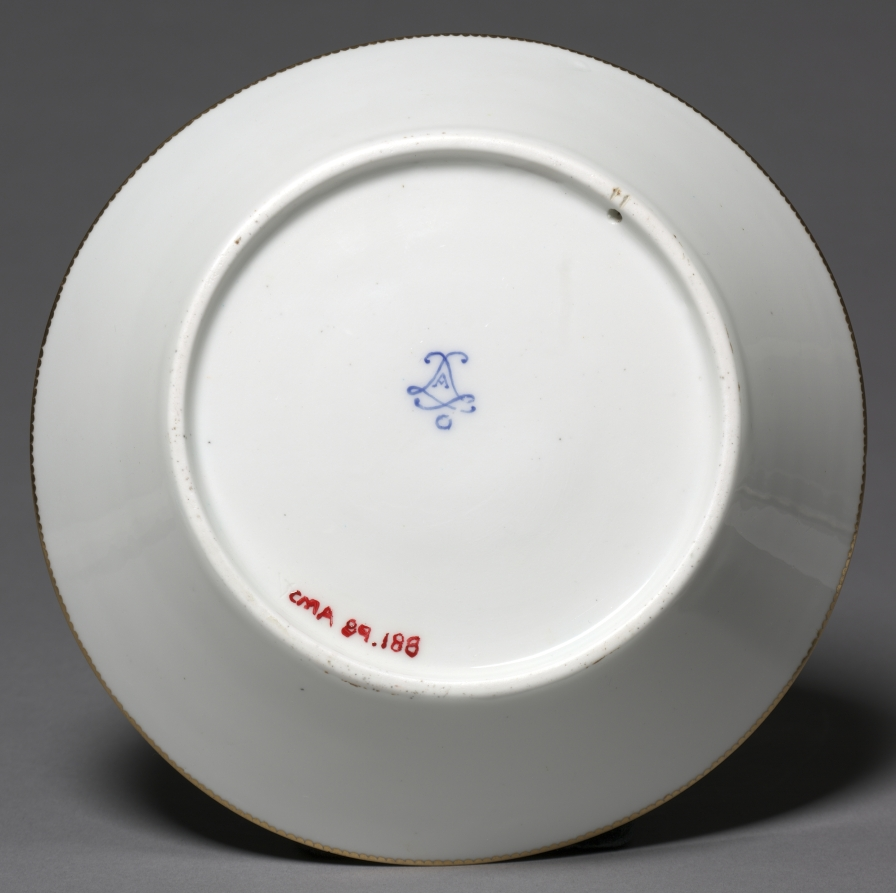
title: Saucer (Soucoupe)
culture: France, Vincennes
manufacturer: Vincennes Porcelain Factory (France, 1740–56)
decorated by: probably by Jean Jacques Siou (French)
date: 1753–54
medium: Soft-paste porcelain with enamel and gilt decoration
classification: Ceramic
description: The rich turquoise ground of this plate was known as bleu céleste (celestial blue) and introduced at the Vincennes factory in 1753. The deep color was achieved by repeated applications of the powdered pigment and multiple firings, which made it difficult for factories to achieve a smooth, even-toned color. Objects decorated with this color through this complicated process were among the most expensive items produced.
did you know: This color was famously used on a 1,749-piece dinner service made for the French king Louis XV in 1753.